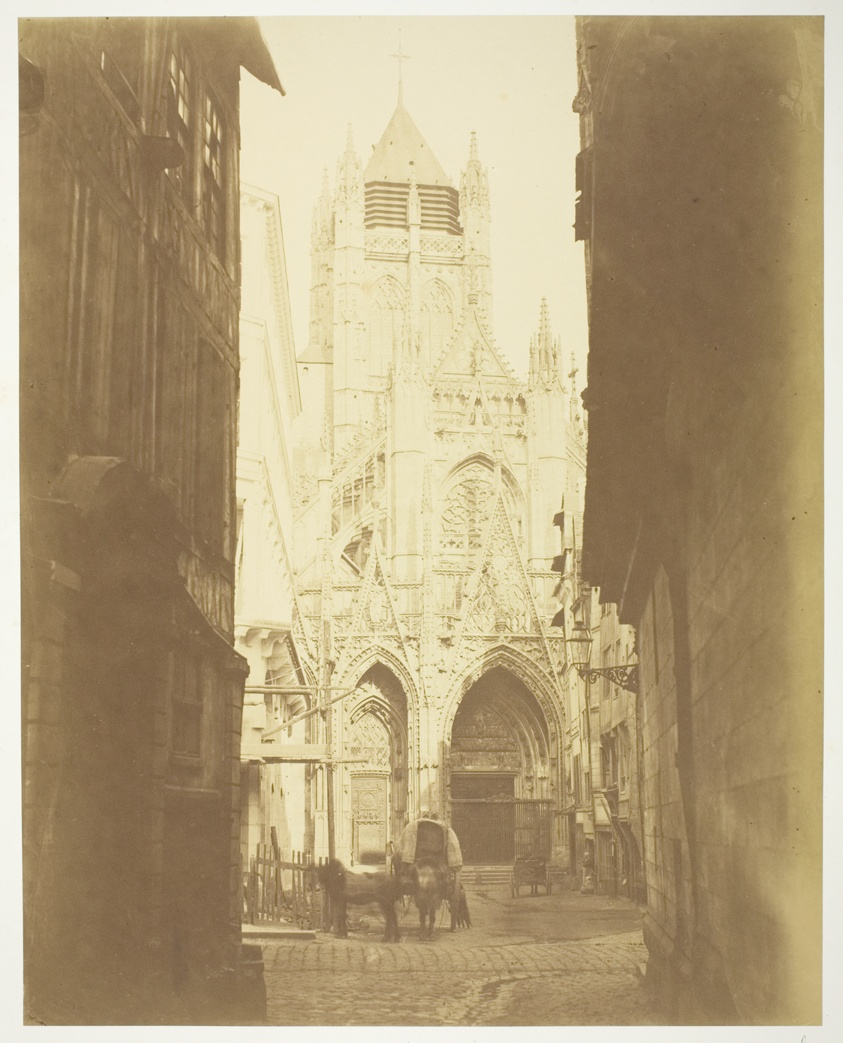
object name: Photograph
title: Saint Maclou de Rouen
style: 19th century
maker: Bisson Frères (Louis-Auguste Bisson, French, 1814–1876 and; Auguste-Rosalie Bisson, French, 1826–1900)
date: 1854/55, printed 1855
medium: Albumen print, from the album "Reproductions photographiques des plus beaux types d’architecture et de sculpture"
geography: France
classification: albumen silver print; photographic process; photography; photograph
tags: Collected by Hugh Edwards, architecture